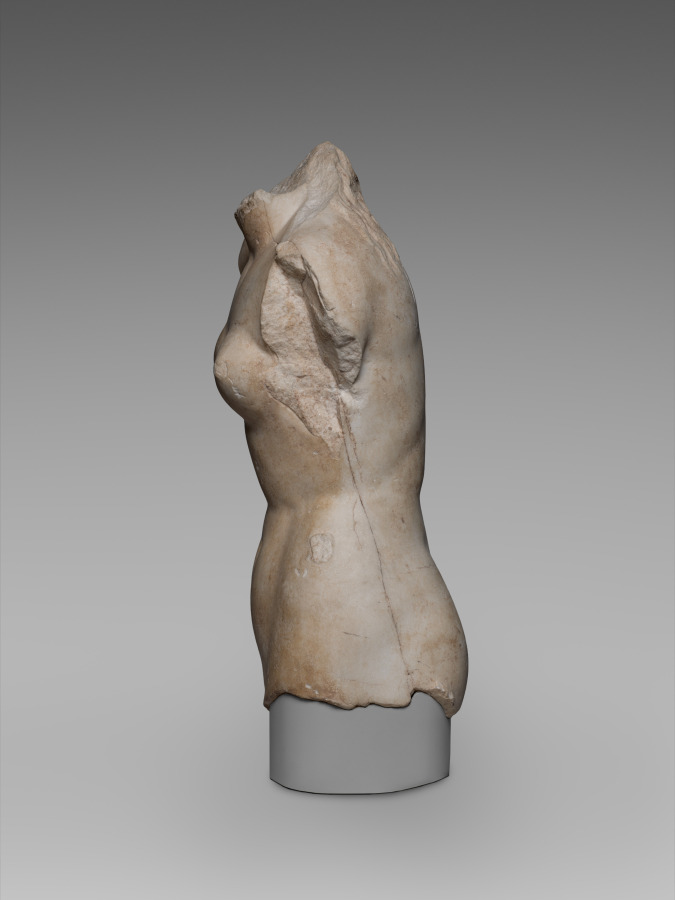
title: Aphrodite Torso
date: 200–1 BCE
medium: Thasian marble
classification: Sculpture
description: This torso can be identified through its nudity and pose as the Greek goddess of love, Aphrodite. Based on the now-lost Aphrodite of Knidos, a revolutionary marble sculpture created by Praxiteles of Athens in the mid-300s BCE, this sculpture belongs to a popular Greek and Roman type showing the goddess at her bath. With hips slightly shifted, she stood in a relaxed posture with most of her weight on one leg, probably with one hand modestly covering her pubic region and the other shielding her breasts or holding drapery. Alternatively, one or both hands may have tended to her wet hair, some of which falls over her neck and upper back.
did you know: This torso is based on the Aphrodite of Knidos, a Greek original by the master sculptor Praxiteles.